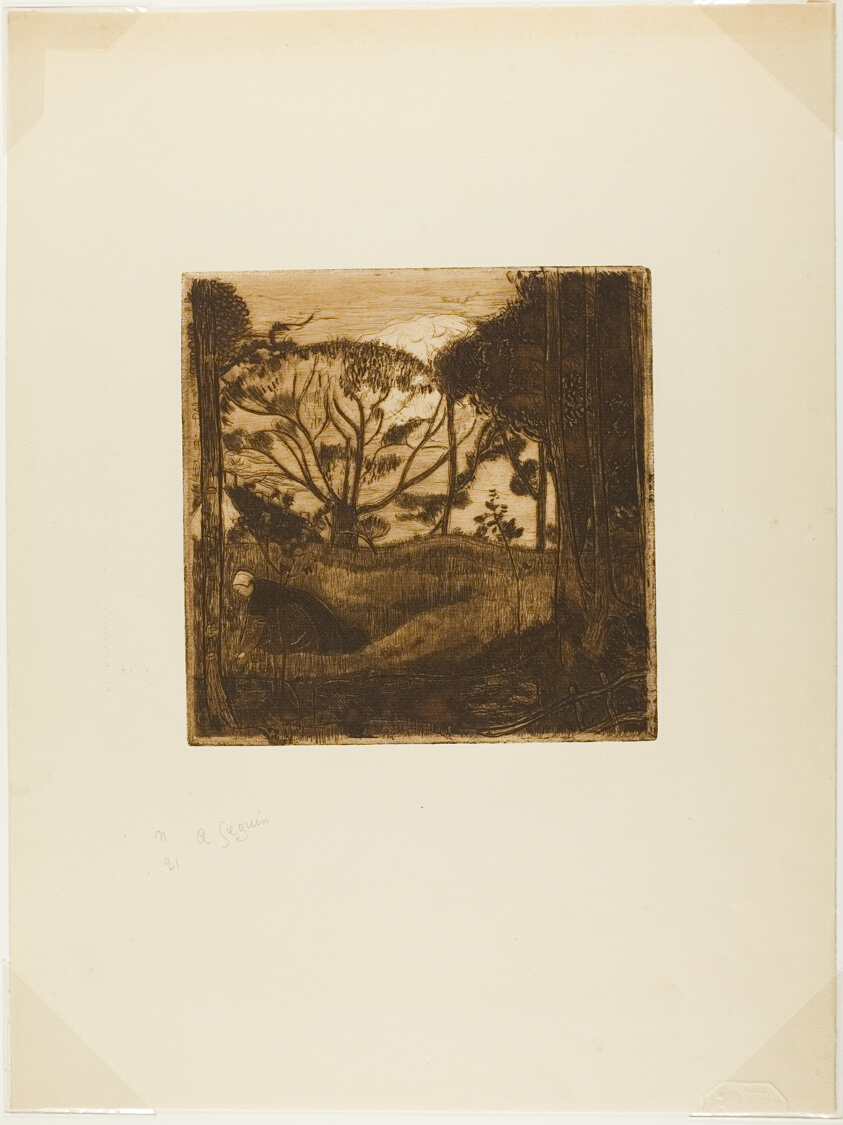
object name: Print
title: Evening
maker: Armand Séguin (French, 1869-1904)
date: 1894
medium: Etching, aquatint and roulette printed in dark brown on cream laid paper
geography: France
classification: etching; print; prints and drawing